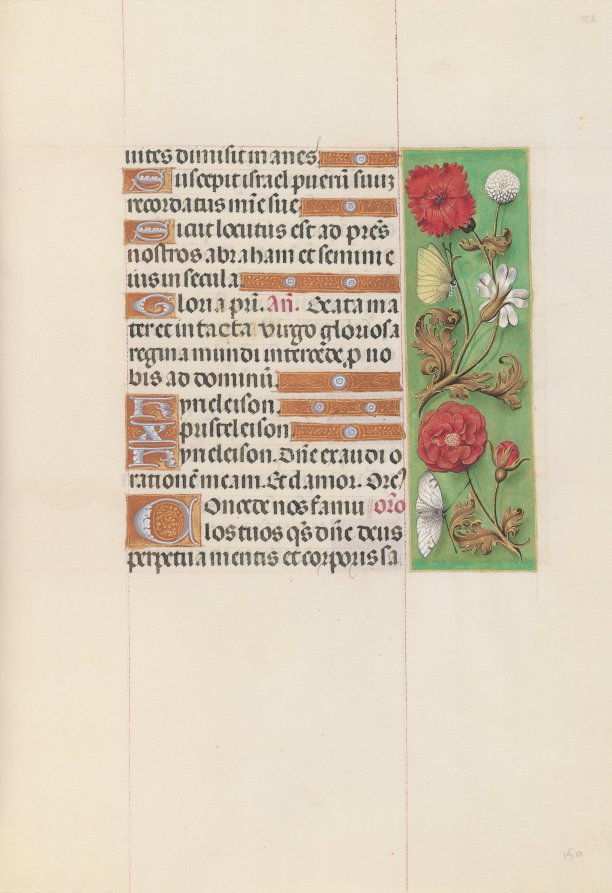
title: Hours of Queen Isabella the Catholic, Queen of Spain: Fol. 152r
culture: Flanders, Ghent and Bruges, late 15th century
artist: Master of the First Prayerbook of Maximillian (Flemish, c. 1444–1519)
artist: and Associates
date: c. 1500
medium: ink, tempera, and gold on vellum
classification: Bound Volume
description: This manuscript was illuminated by a circle of at least five highly organized manuscript painters active in the Flemish cities of Ghent and Bruges. The principal illuminator was Alexander Bening, who painted the majority of the book's miniatures. Manuscripts produced by this circle of artists are renowned for the decoration of their borders, which typically feature a rich variety of realistically-painted flowers, birds, and butterflies. This prayer book, called a book of hours, was intended not for a cleric, but for the private devotions of a lay person-in this case, Isabella the Catholic, Queen of Spain (1451-1504). Isabella's coat of arms embellishes the book's frontispiece. It is unlikely that the book was commissioned by the Queen herself; rather, she probably received it as a diplomatic gift from someone courting her patronage, perhaps Cardinal Francisco Jimenez de Cisneros. A Franciscan friar, Jimenez was dependent upon Isabella for his advancement, first to the post of Queen's confessor in 1492, and then to Archbishop of Toledo in 1495.